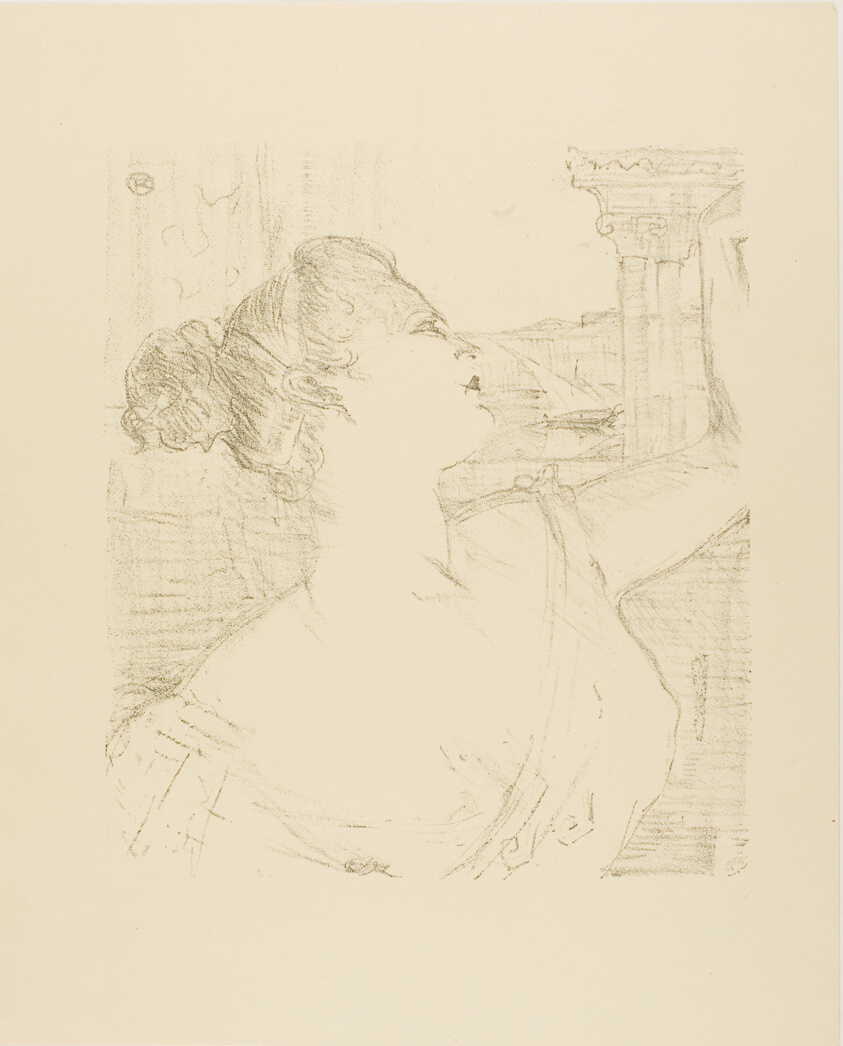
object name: Print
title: Sybil Sanderson, from Treize Lithographies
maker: Henri de Toulouse-Lautrec (French, 1864-1901)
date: 1898, published before 1906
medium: Lithograph on cream wove paper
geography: France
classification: lithograph; print; prints and drawing